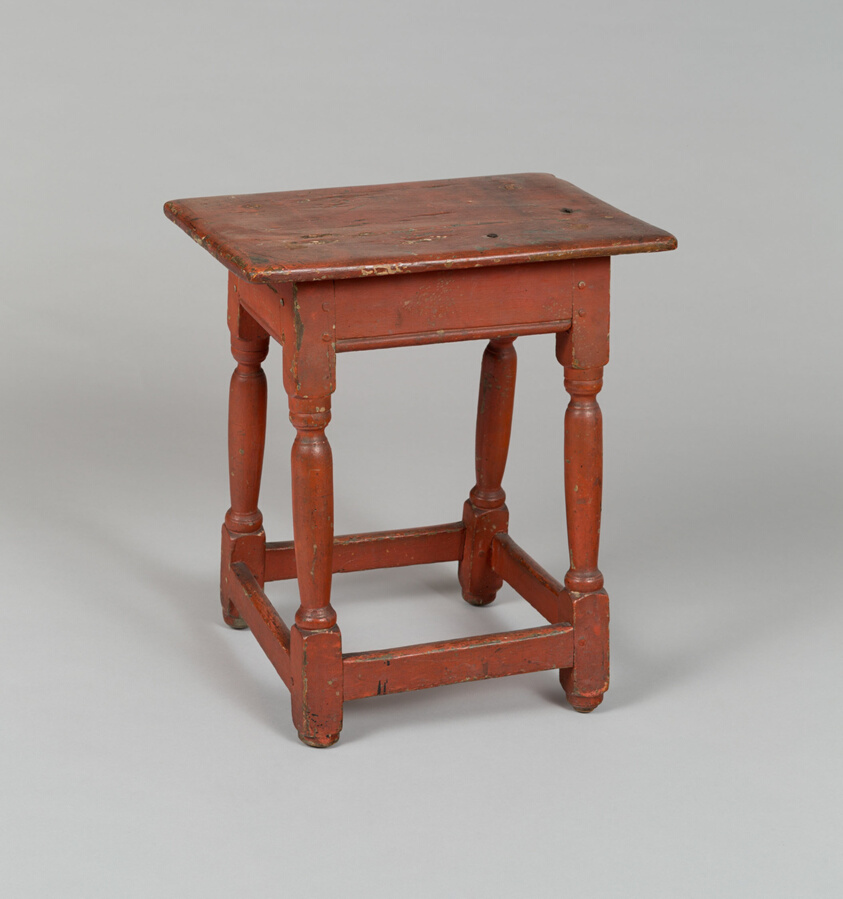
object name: Furniture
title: Stool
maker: Artist unknown (American, 17th–18th century); New England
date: 1690–1720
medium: Maple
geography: New England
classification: seating; furniture; american decorative arts; american arts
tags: furniture